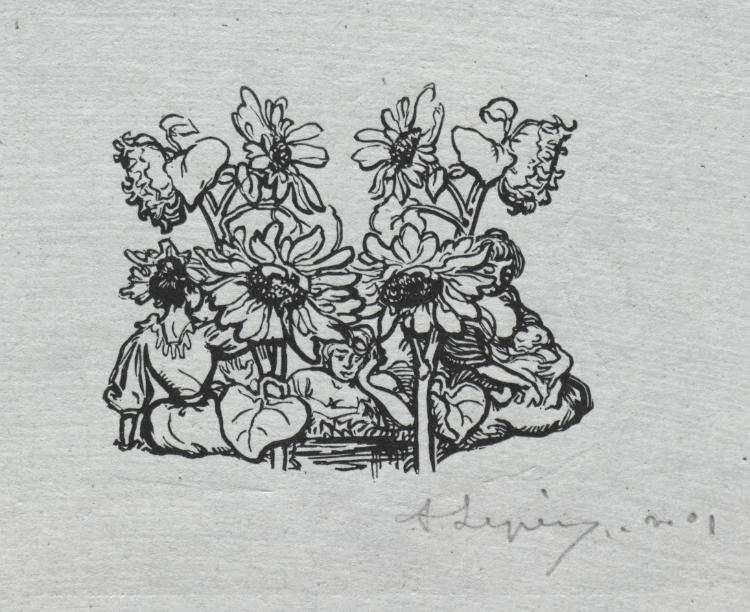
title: Paris Almanac, 1897: Tail-piece, Summer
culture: France, late 19th Century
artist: Auguste Louis Lepère (French, 1849–1918)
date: 1897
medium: wood engraving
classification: Print